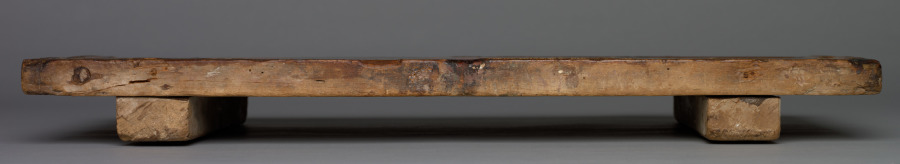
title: Icon of the New Testament Trinity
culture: Byzantium, Constantinople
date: c. 1450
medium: Tempera and gold on wood panel (poplar)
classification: Painting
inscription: Ο ΠΑΛΑΙΟC ΤΗΩ- God the Father as Christ in old age on right identified on either side of his head in gold, outlined in red.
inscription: ΤΟ ΑΙΟΝ ΠΝΑ- The Holy Spirit, identified by dove in gold outlined in red.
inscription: ΙΩCHΦ Ο ΠΟΙΗΤΗC- St. Joseph the Hymnographer identified on the left by gold letters, outlined in red.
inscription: ΚΟCΜ Ο ΠΟΙΗΤΗC- St. Kosmas the Hymnopgrapher identified on the right in gold letters in red outline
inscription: "'together with...you my God' and 'your dominion" in Scroll of Kosmas on the right.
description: This icon depicts an important subject in Orthodox Christian art, the three corresponding figures of the single godhead known as the Holy Trinity. The Trinity is represented here in a composition known as the “New Testament Trinity,” which features Christ and God the Father seated on a bench with a dove representing the Holy Spirit between them. The central field is occupied by a large wooden throne with gold highlights on which Christ (left) and the Ancient of the Days (God the Father as Christ in old age) are seated. The Holy Spirit, in the form of a dove, hovers within an eight-pointed star that signifies the eighth day, the future eon. On either side of the Trinity are two hymnographers, authors of hymns of praise, both identified by gold letters outlined in red—Saint Kosmas (about 675–752) on the left and Saint Joseph (about 812/818–about 886) on the right. They both suspend scrolls from round-arched windows. The icon likely was part of a church templon, the barrier that separated the nave from the sanctuary in an Orthodox church. It is not signed or dated; however, careful analysis of the painting’s style and technique places it in Constantinople around 1450, just prior to the city’s fall to the Ottomans in 1453. It represents a moment when Byzantine painting reached a brilliant crescendo.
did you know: More than just a breakfast food, eggs are used to make the tempera paint used in this painting.